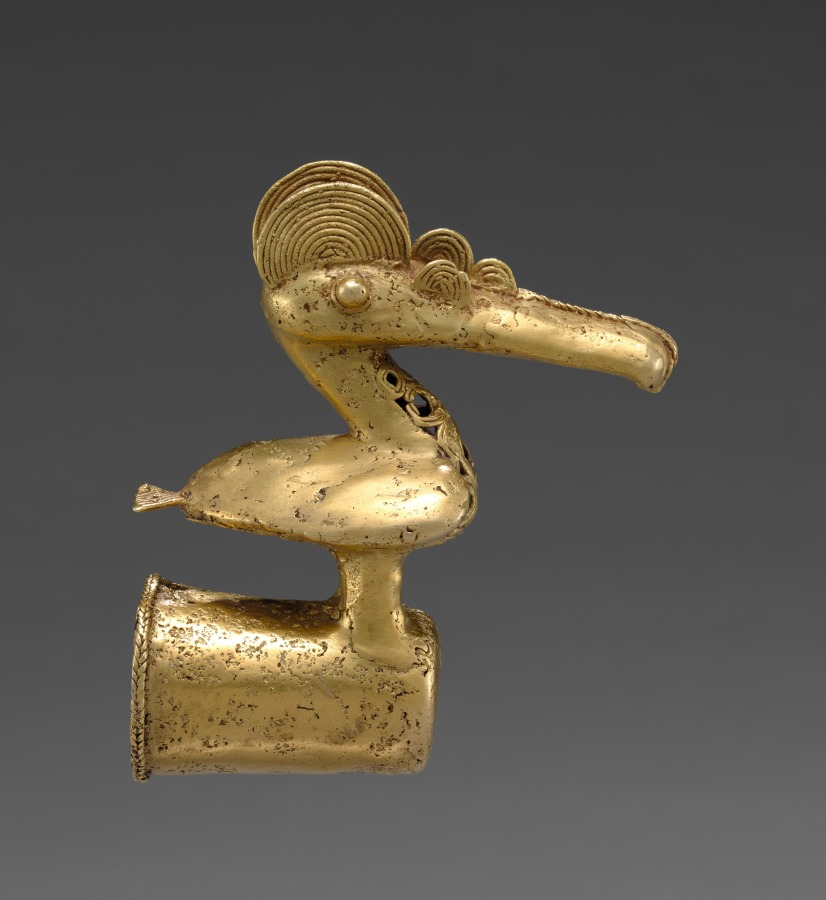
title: Finial with Long-Beaked Bird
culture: Isthmian Region (Colombia), Sinú (Zenú), 5th century-11th century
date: 400–1000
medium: gold, cast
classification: Metalwork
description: Unique to Colombia's Sinú region are gold finials with sculptural images at right angles to thimble-like caps; the caps fit over the end of a staff, an emblem of rank that may have been held horizontally. This impressive finial features a dignified, long-beaked bird whose body contains a pellet that rattles when the finial moves. Sinú animal imagery is understudied but may relate to beliefs about the cosmos. For instance, contemporary natives attribute importance to birds because they have the capacity to move among different environments (air, land, water); they may have been regarded as mediators among levels of the cosmos.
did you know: Birds, particularly water birds, may have been thought to travel between the different layers of the universe.